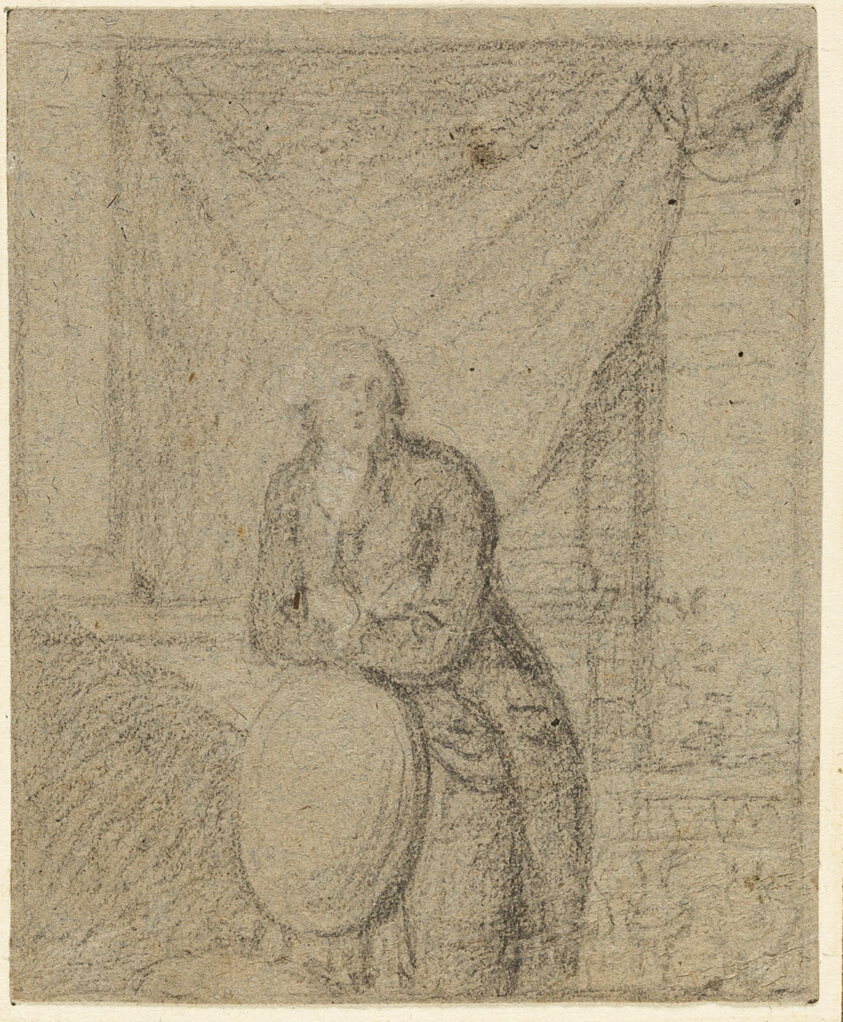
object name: Drawing and Watercolor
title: Portrait of a Man Standing in Front of Window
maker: Benjamin West (American, 1738-1820)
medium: Black chalk heightened with traces of white chalk, on gray laid paper, perimeter mounted to cream wove card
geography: United States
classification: chalk; drawings (visual works); prints and drawing